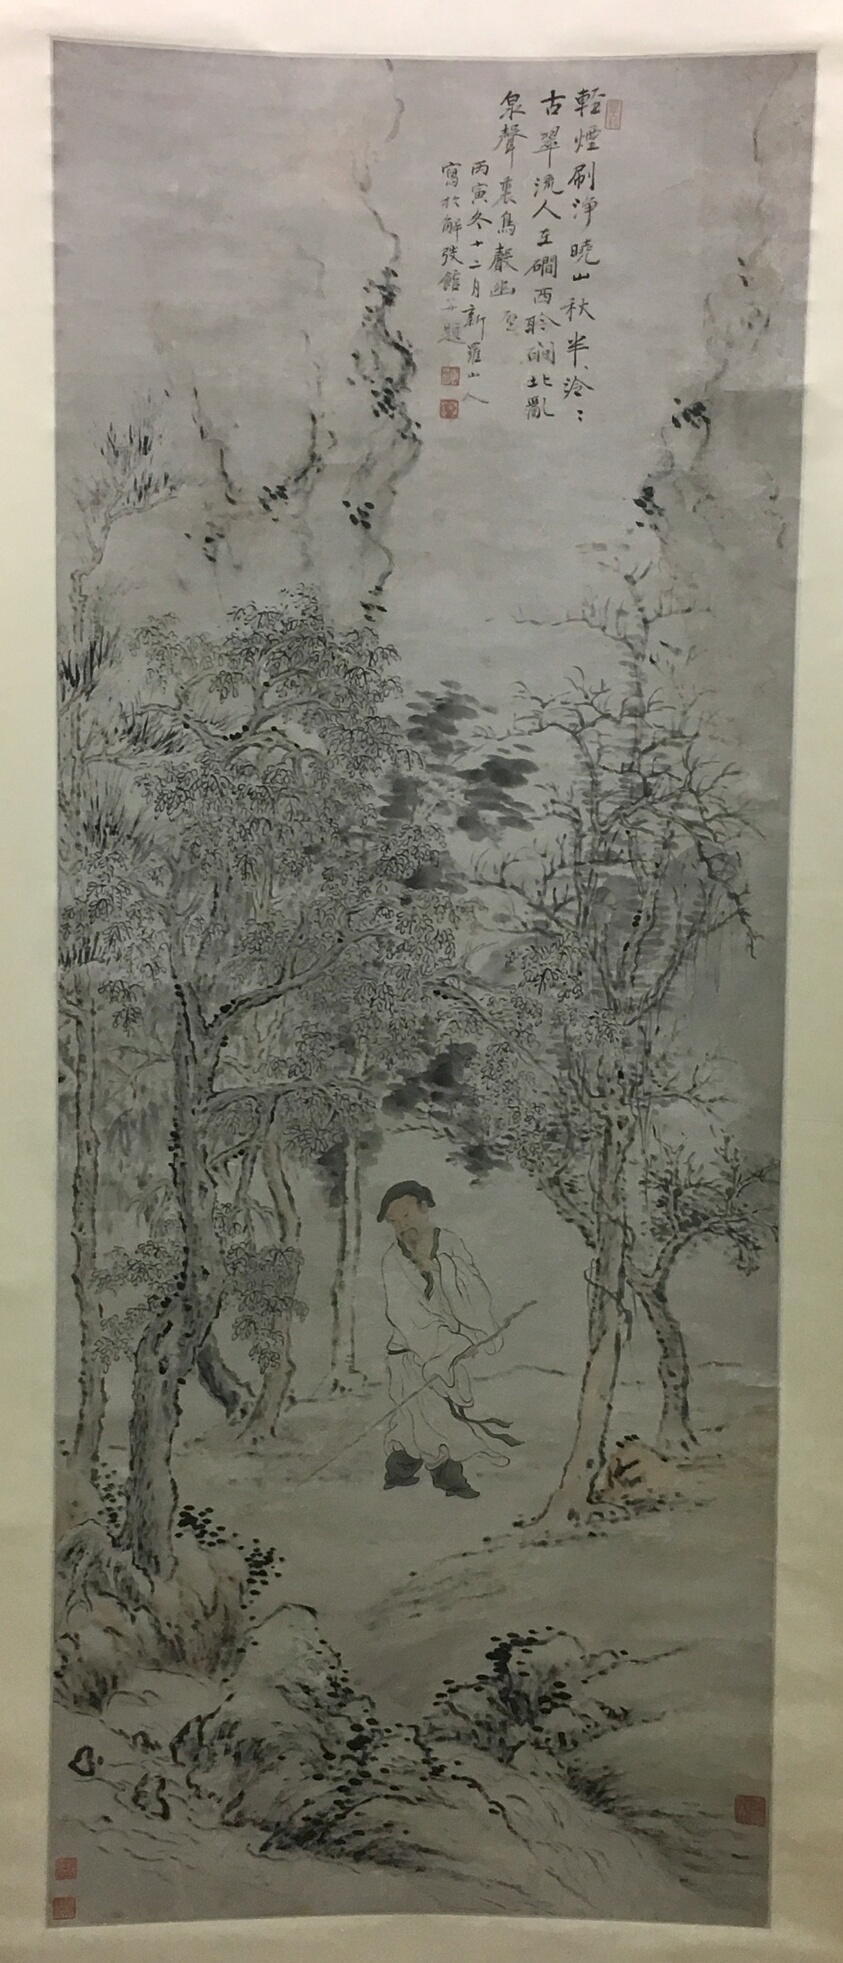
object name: Painting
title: Man with Staff by a Stream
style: Chinese (culture or style)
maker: Hua Yan (Chinese, 1682-c. 1765)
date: Qing dynasty (1644–1911)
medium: Hanging scroll; ink and light color on paper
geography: China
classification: hanging scroll; painting; asian art